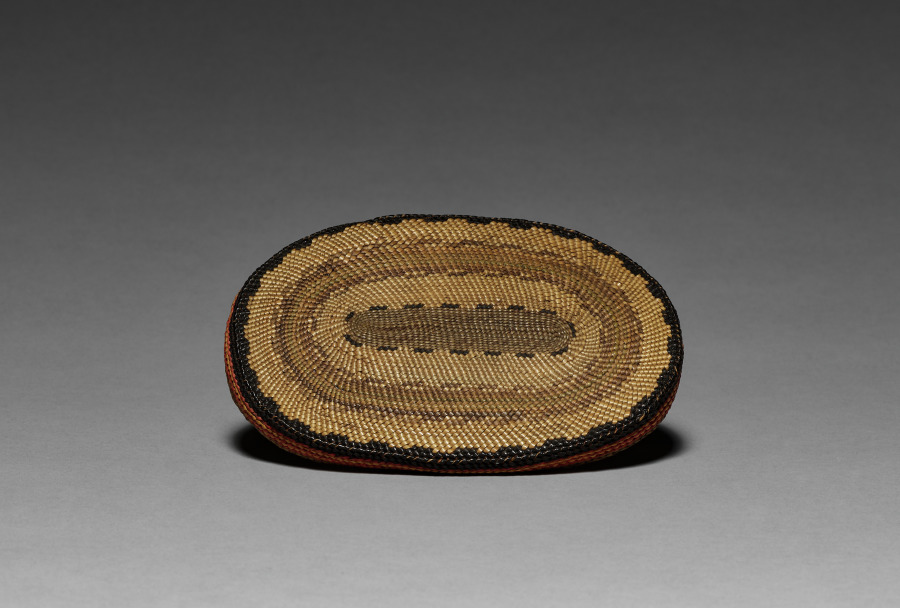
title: Lidded Bowl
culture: Northwest Coast, Vancouver Island, early 20th century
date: c 1900– 1925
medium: twined grass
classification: Basketry